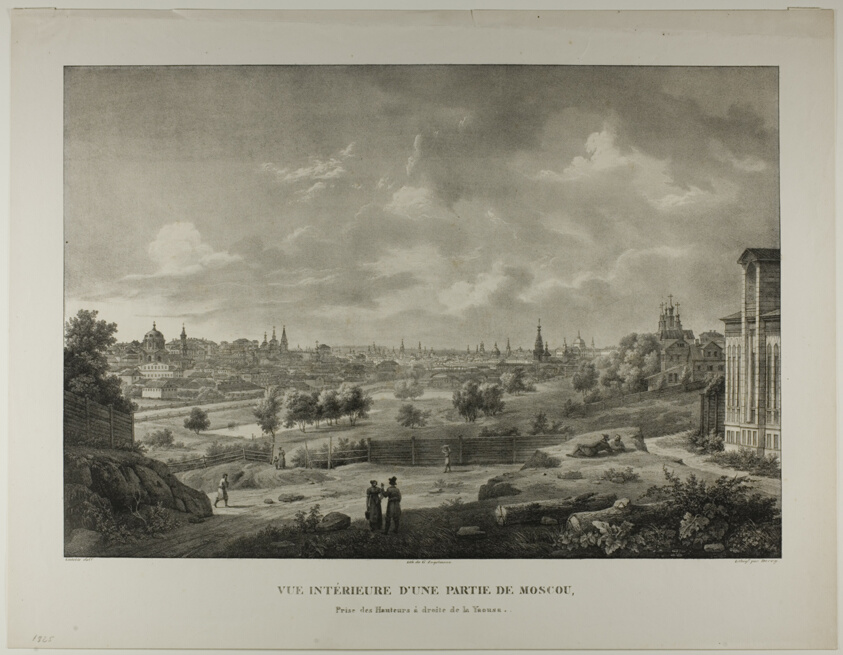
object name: Print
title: View of a Part of Moscow from the Heights to the Right of the Yaousa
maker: Deroy (French, 19th century); after Jean-Baptiste Cadolle (French, 1782-1849); printed by Gottfried Engelmann (French, 1788-1839)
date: 1833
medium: Lithograph in black on ivory wove paper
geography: France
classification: lithograph; print; prints and drawing